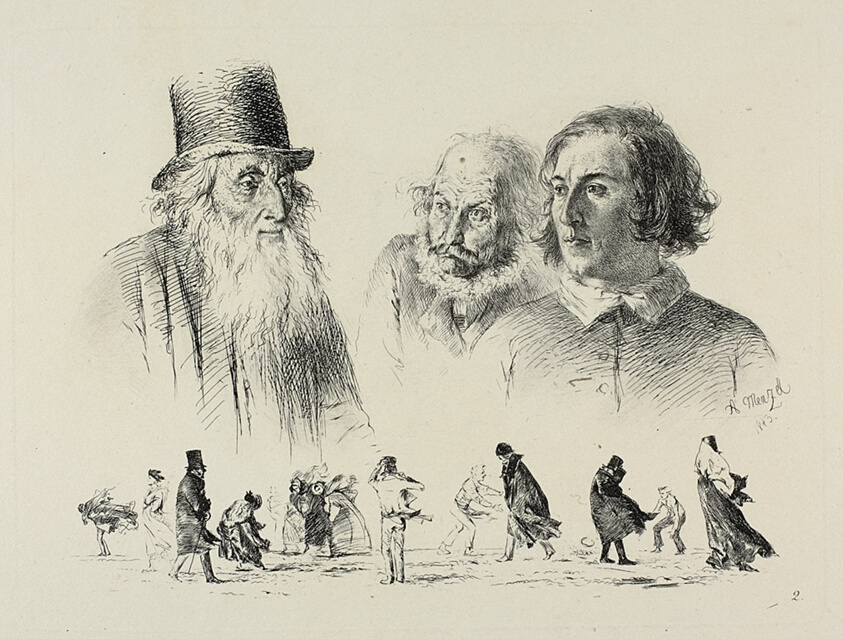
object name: Print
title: Plate two, from Radierversuche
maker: Adolph Menzel; German, 1815–1905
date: 1843, published 1844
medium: Etching in black on ivory wove paper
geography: Germany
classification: etching; print; prints and drawing